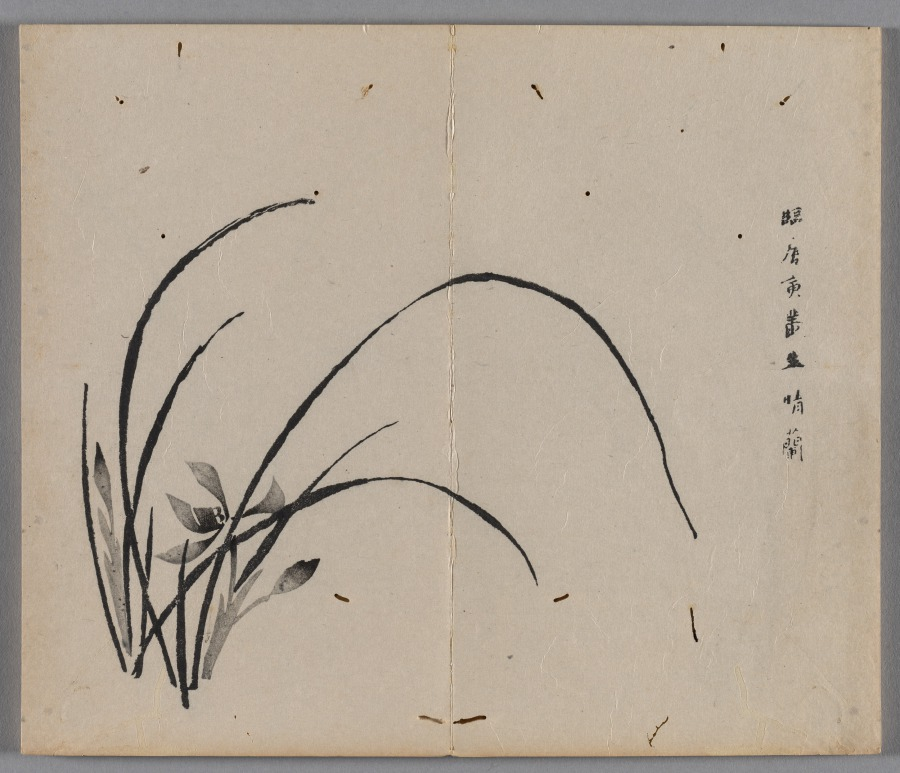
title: Ten Bamboo Studio Painting and Calligraphy Handbook (Shizhuzhai shuhua pu): Orchids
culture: China, Qing dynasty (1644-1911)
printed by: Hu Zhengyan (Chinese, c. 1584–1674)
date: 1633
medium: Woodblock-printed book; ink and colors on paper; first edition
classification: Print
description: Color printing reached a level of perfection in the early 1600s, as seen in this Ten Bamboo Studio Collection of Calligraphy and Painting and the Mustard Seed Garden Manual of Painting (printed 1679 and 1701). The painterly quality, precision in registering (aligning) the woodblocks, and harmonious colors made them the most successful color print editions in Chinese history. Both editions were printed and compiled in Nanjing, spread nationwide, and had a great impact on the arts in Japan and Korea.